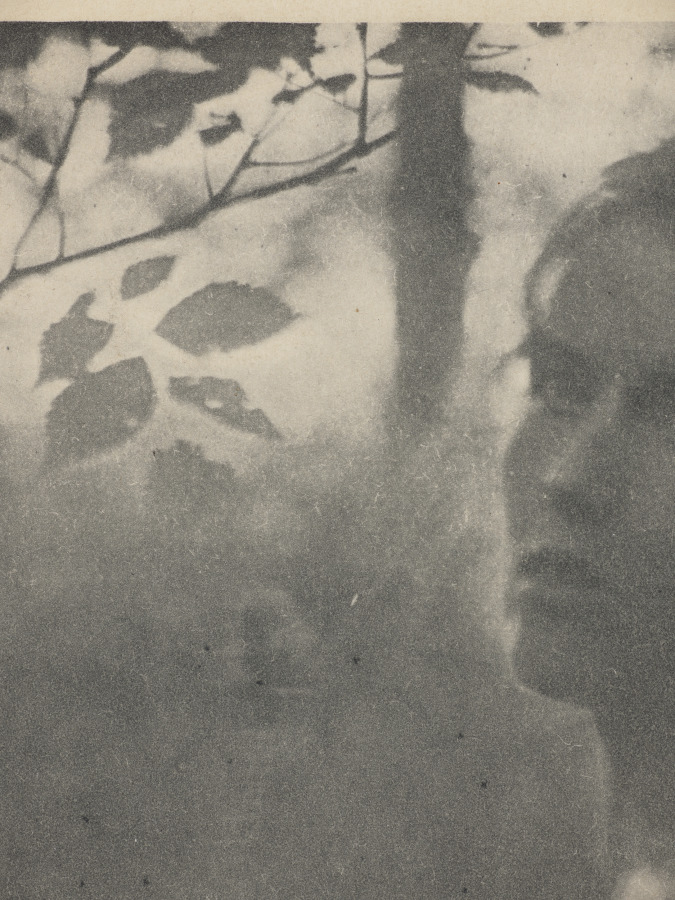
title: The Edge of the Wood - Evening (Letitia Felix)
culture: America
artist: Clarence H. White (American, 1871–1925)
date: 1900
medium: photogravure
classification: Photograph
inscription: Written in pencil on recto: "Clarence H. White [signed] '00"; in pencil on verso: " 'The Edge of the Wood-Evening'- / Clarence H. White"; in pen on verso: "Letitia Felix"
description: Clarence H. White experimented with an array of artistic media that blurred the lines between photography, drawing, and printmaking. Here are two examples of that experimentation: a platinum print on the left and a photogravure on the right. White was likely drawn to both processes for their broad tonal range and interaction of image and paper. To create platinum prints, a light-sensitive liquid emulsion is applied to and absorbed by the paper. The image forms within the paper’s fibers, resulting in a matte appearance. Because photogravures are printed like an etching, the image is formed with ink impressed onto the paper’s surface.